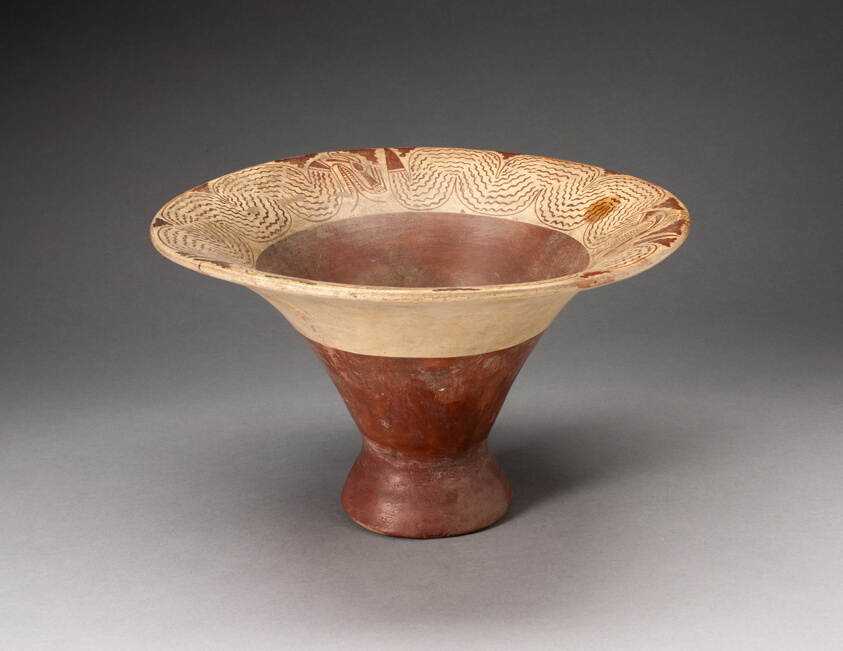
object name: Vessel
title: Flaring Bowl with Inner Rim Depicting Undulating Serpents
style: moche, mochica, early intermediate period, Pre-Columbian, americas, Arts of the Americas, andean, andes, south american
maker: Moche (North coast, Peru)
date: 100 BCE–500 CE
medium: Ceramic and pigment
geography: Peruvian North Coast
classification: bowl; earthenware; art of the americas; ceramics; vessel